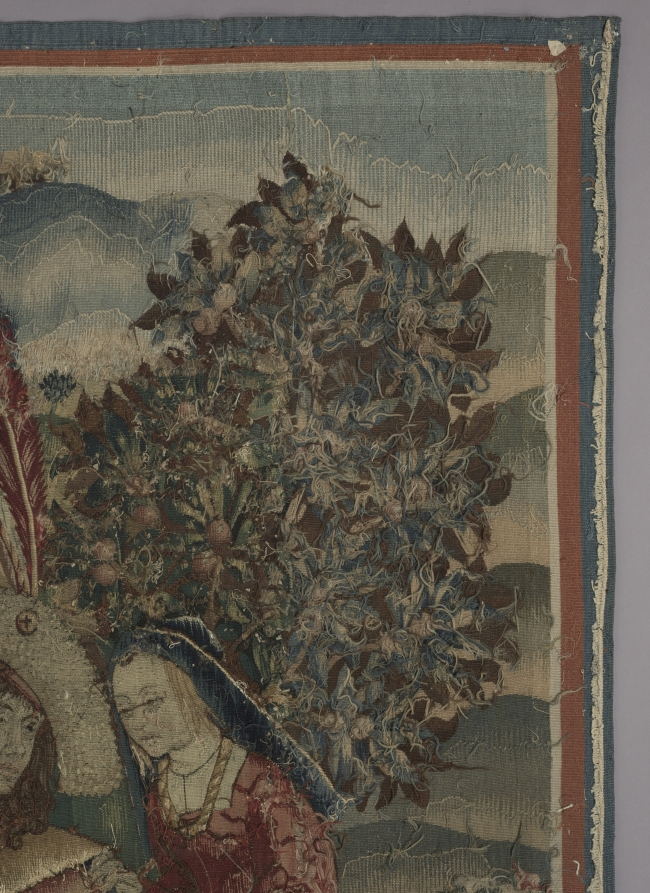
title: Shepherds in a Round Dance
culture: Netherlands, early 16th century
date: around 1500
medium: Wool and silk: tapestry weave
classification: Tapestry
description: Late medieval tapestries often use a limited yet contrasting color palette to portray stylized images. The expressions of these figures, for example, are conveyed more by their postures than by their faces. Four shepherds and shepherdesses join hands and dance to the music of a bagpiper at the far right, while a lord and two ladies on the left look on. A dog and sheep amid blossoming plants and trees contribute to the festive pastoral scene in front of a castle.